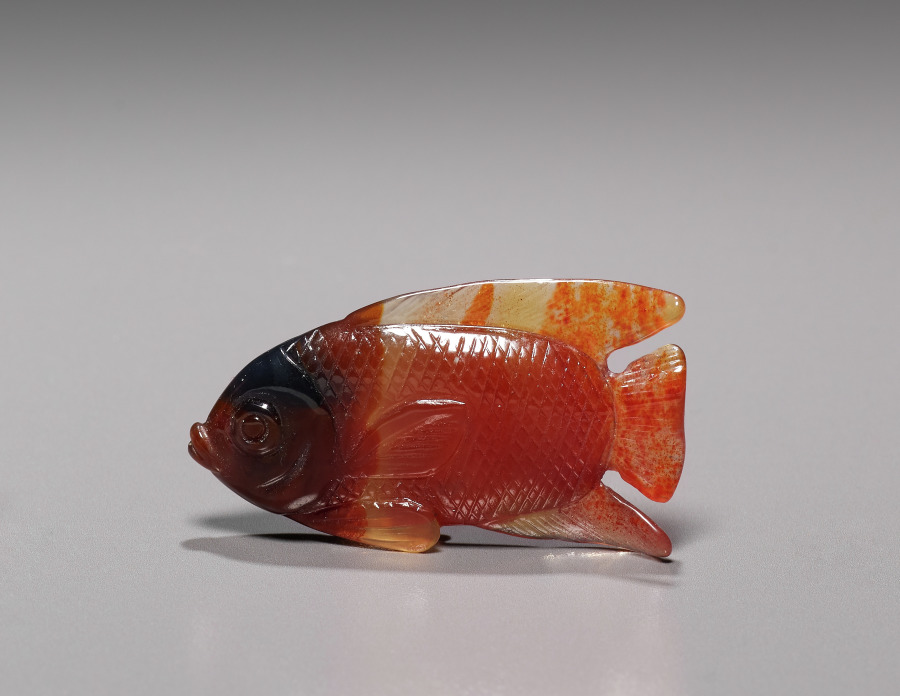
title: Fish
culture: Russia, St. Petersburg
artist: House of Fabergé (Russian, 1842–1918)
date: c. 1890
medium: agate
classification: Miscellaneous